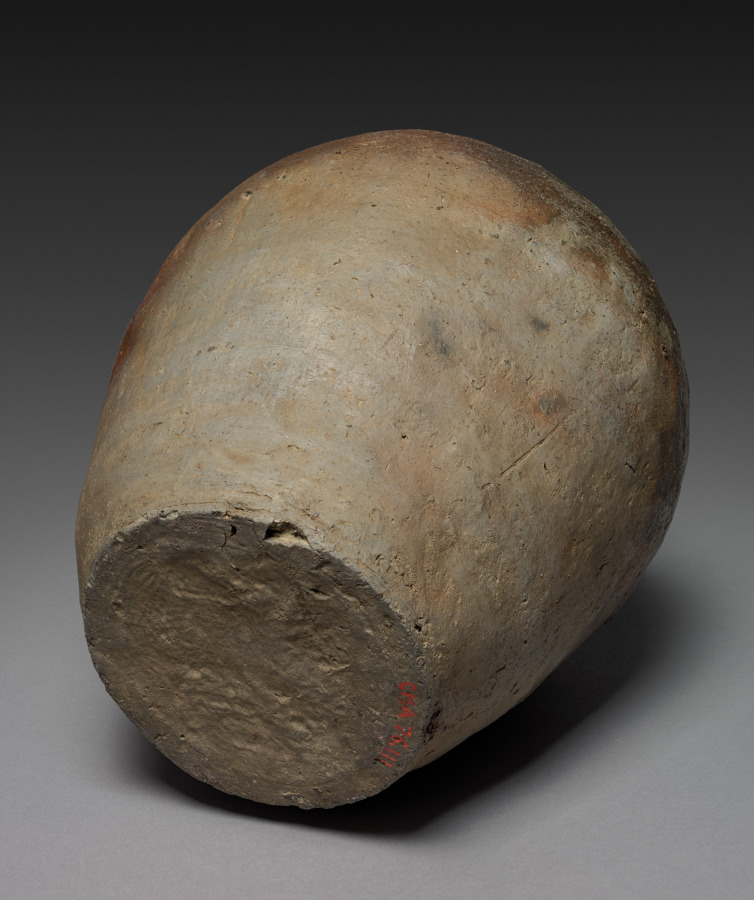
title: Jar with Incised Combed Shoulder Designs: Bizen Ware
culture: Japan, Muromachi period (1392–1573)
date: 1400s–1500s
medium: stoneware, ash glaze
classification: Ceramic